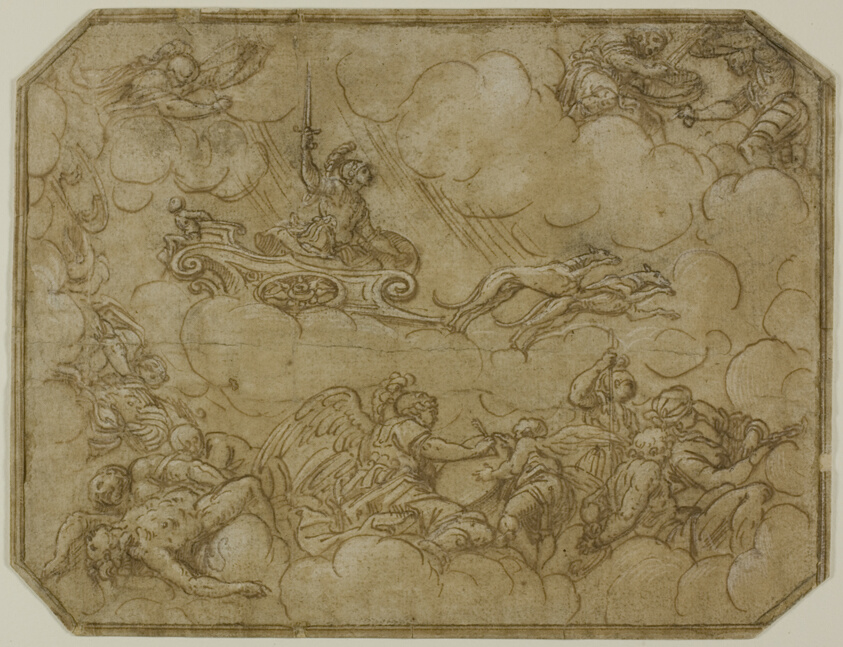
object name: Drawing and Watercolor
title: Ceiling Design with Mars Driving His Chariot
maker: Lattanzio Gambara (Italian, c. 1530-1574)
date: 1565/69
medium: Pen and brown ink, with traces of black chalk, heightened with lead white (partially oxidized), on tan laid paper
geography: Italy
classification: pen and ink drawings; drawings (visual works); prints and drawing